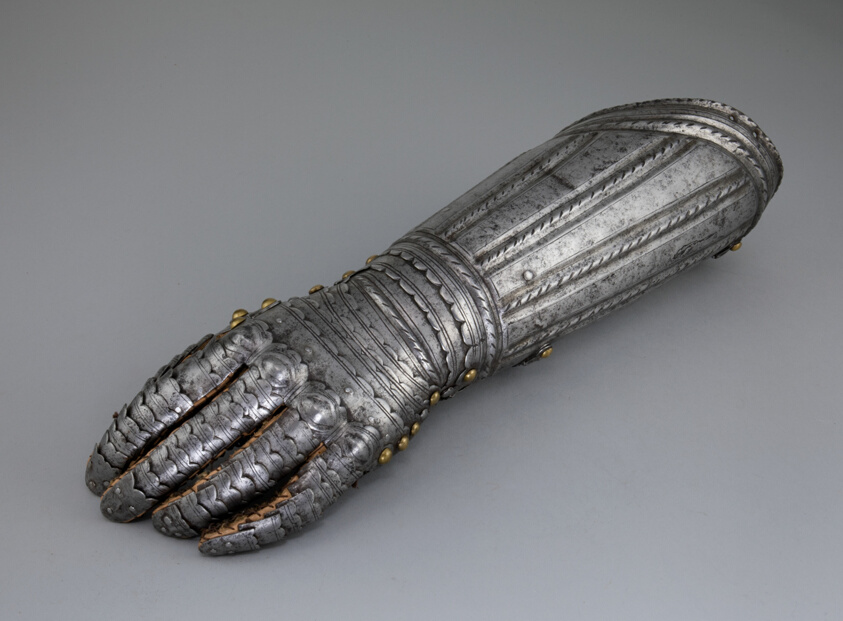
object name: Armor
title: Parrying Gauntlet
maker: Italian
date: 1550/1575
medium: Steel, iron, linen textile, and leather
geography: Italy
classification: suit-gauntlet; armor; arms and armor